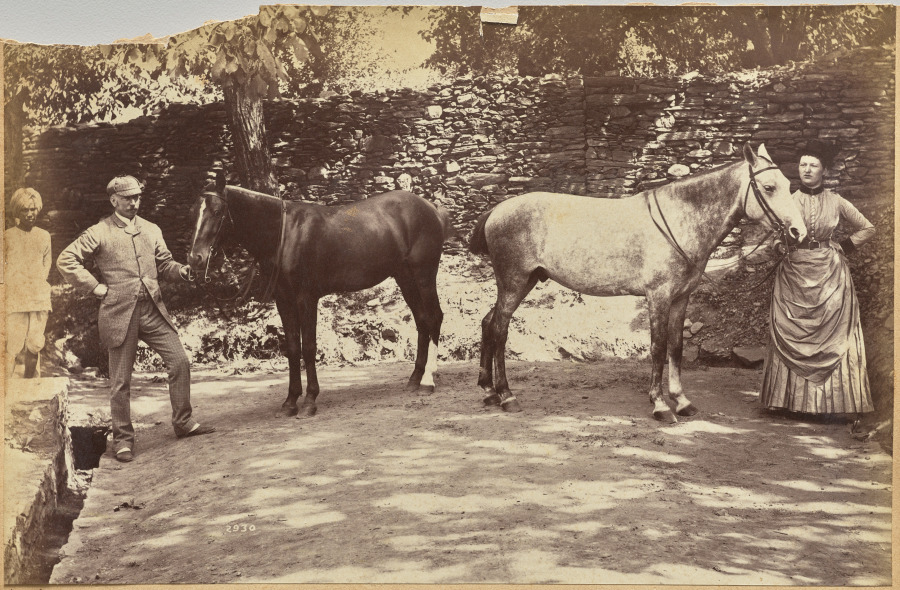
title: Col. F. G. Oldham (recto, top)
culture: India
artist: Raja Deen Dayal (Indian, 1844–1905)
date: c. 1882–87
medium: albumen print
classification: Photograph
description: These photographs are part of an album, now disassembled, of around 105 photographs taken in India between 1885 and summer 1887 that provide glimpses into the lives of the British colonial elite and royal and upper-class Indians. The museum holds another group of 37 pictures from this album (2016.266), which was probably commissioned by a British civil servant visiting or working in India around 1888 as a personal souvenir of his experiences there.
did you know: Raja Deen Dayal is regarded now, and was considered during his lifetime, to be India’s most important 19th-century photographer.